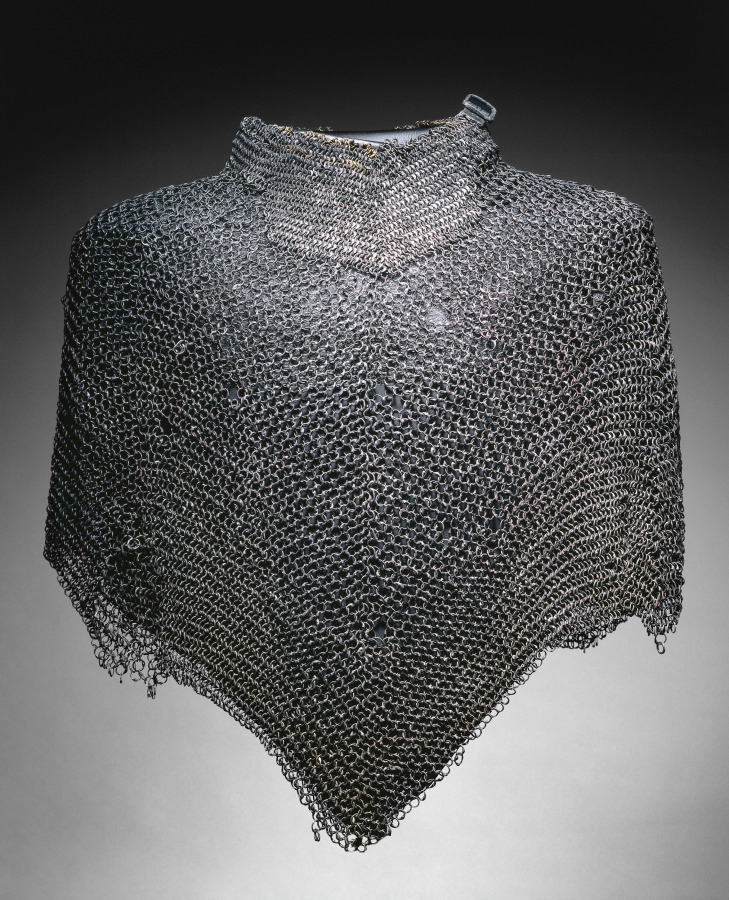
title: Bishop's Mantle (Cape)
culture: European (German or Swiss?), early 16th century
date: c. 1520–30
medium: riveted steel (some brass) rings; reinforced collar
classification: Arms and Armor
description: Chain mail capes known as "bishop's mantles" were popular with German mercenary foot soldiers between about 1500 and 1550. They were often worn as the only element of armor.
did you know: In 805 an edict of Charlemagne established a link between the right to own land and the obligation to own a chainmail shirt.